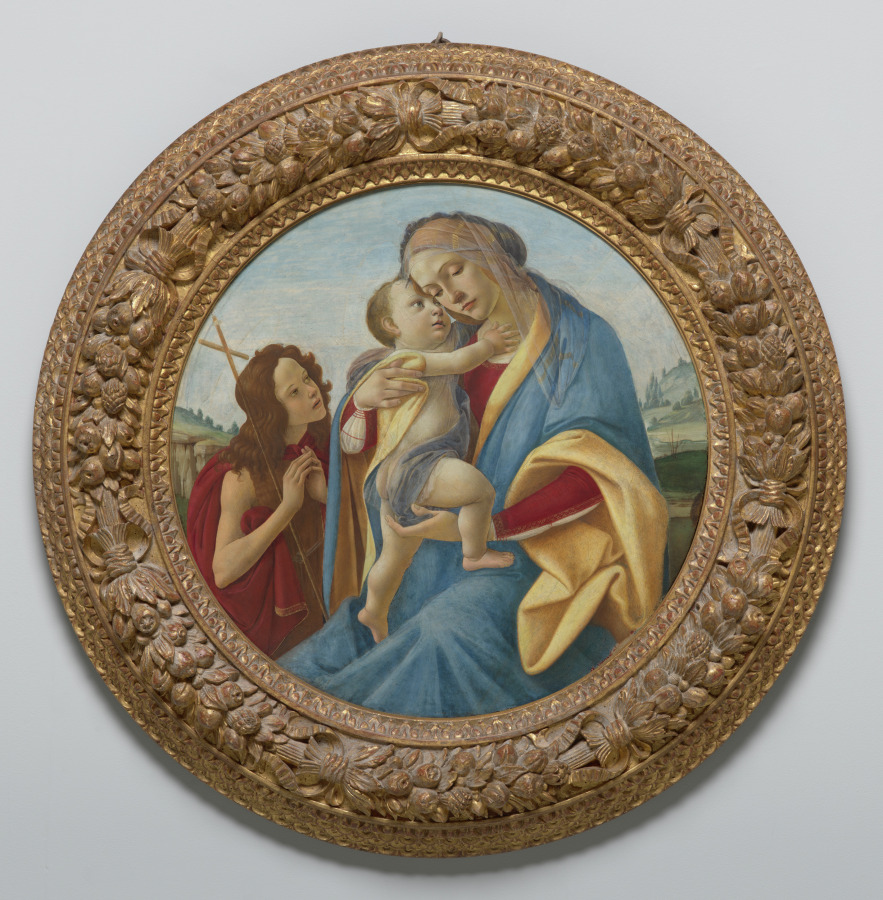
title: Virgin and Child with the Young Saint John the Baptist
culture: Italy, 15th century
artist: Sandro Botticelli (Italian, 1444/45–1510)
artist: and Workshop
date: c. 1490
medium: tempera and oil on wood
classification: Painting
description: The perfectly round form, called a tondo, became popular during the 1440s, especially in Florence. Made for domestic settings instead of churches, the circular format challenged the artist to create a harmonious, balanced composition within this more difficult shape. The attribution has been a matter of debate. Botticelli often collaborated with students, including Filippino Lippi, who would himself become a significant painter. Few specialists have doubted that Botticelli executed the central passages: the delicate modeling of the faces, the graceful poses, the figures’ profound interiority, and the diaphanous veil are the artist’s hallmarks. However, someone else in Botticelli’s studio probably painted Mary’s blue garment, also the most heavily restored part of the painting.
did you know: Saint John the Baptist, depicted here as a youth, and the Virgin were both patron saints of Florence.